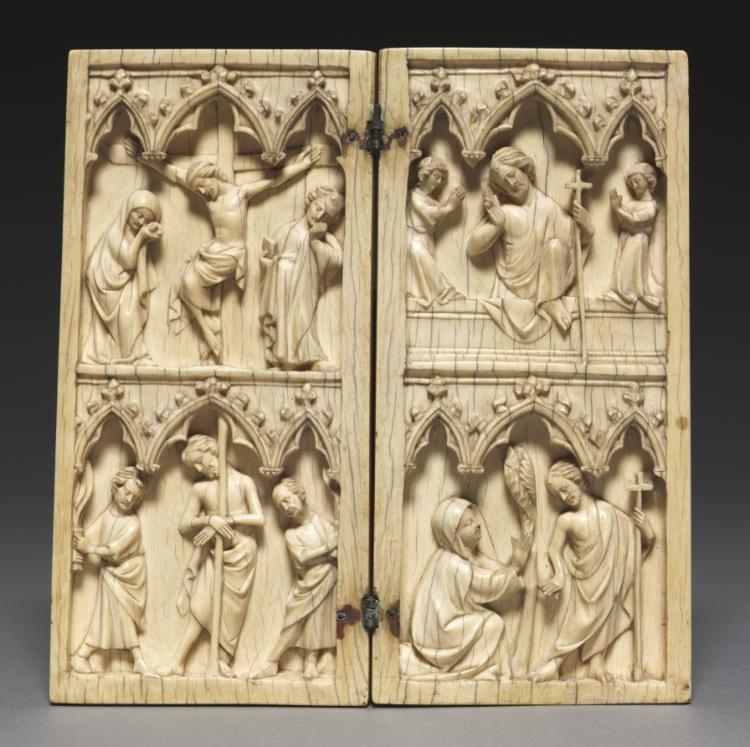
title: Diptych: Scenes from the Passion and Afterlife of Christ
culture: France, Gothic period, 14th century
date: c. 1330–1350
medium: ivory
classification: Ivory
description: The four scenes represented on this ivory diptych are Christ’s Flagellation and Crucifixion on the left panel and Christ’s Resurrection and Appearance to Mary Magdalene (Noli me tangere, or "Do not touch me"). Ivory diptychs like this one illustrating pivotal moments in the story of Christ’s Passion and resurrection served as powerful tools in the devotional practices of elite members of society during the later Middle Ages.